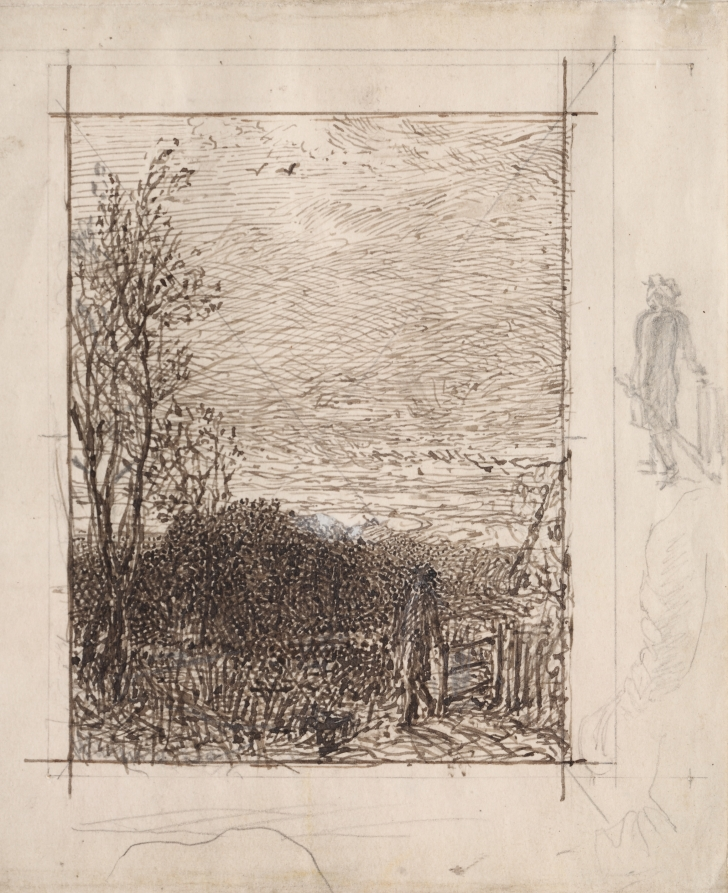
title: The Skylark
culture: England, 19th century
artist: Samuel Palmer (British, 1805–1881)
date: c. 1850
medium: pen and ink over graphite with white heightening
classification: Drawing